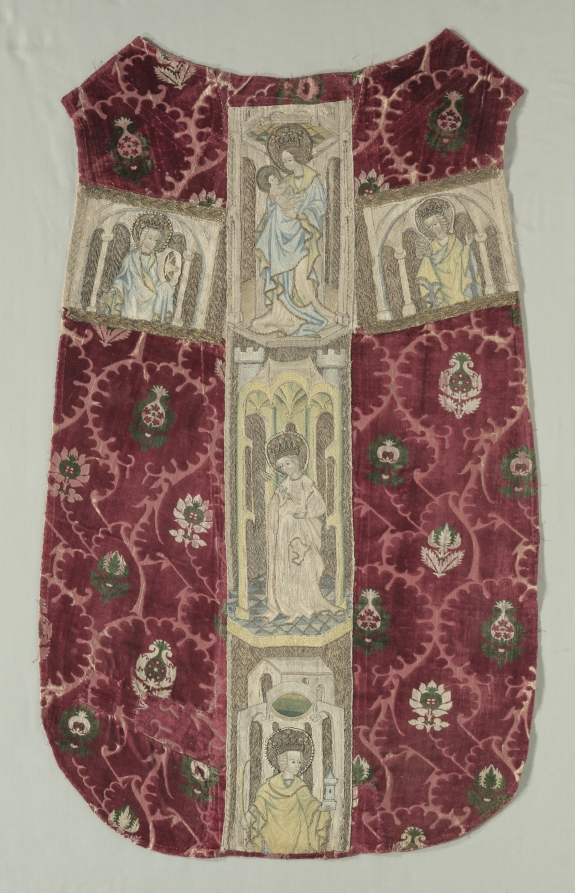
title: Chasuble Back with Embroidered Orphrey Band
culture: Italy (chasuble ground); Austria, Graz (orphrey)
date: 1415–25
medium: Velvet: cut pile and voided; silk, gold and silver thread: embroidery; split and couching stitches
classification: Embroidery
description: The chasuble is the main sleeveless outer vestment worn by priests while officiating during Mass. By the 1400s, the chasuble became highly ornamented with embroidered decorative bands called orphreys, often in the shape of a cross, as seen here. This luxurious Italian example features velvet of three colors with lush pile. In Graz, Austria, it was embellished with a locally embroidered orphrey featuring crowns, haloes, and backgrounds of scenes formed with gold thread. The Virgin and Child, and Saints Catherine, Dorothy, Ursula, and Barbara are featured.